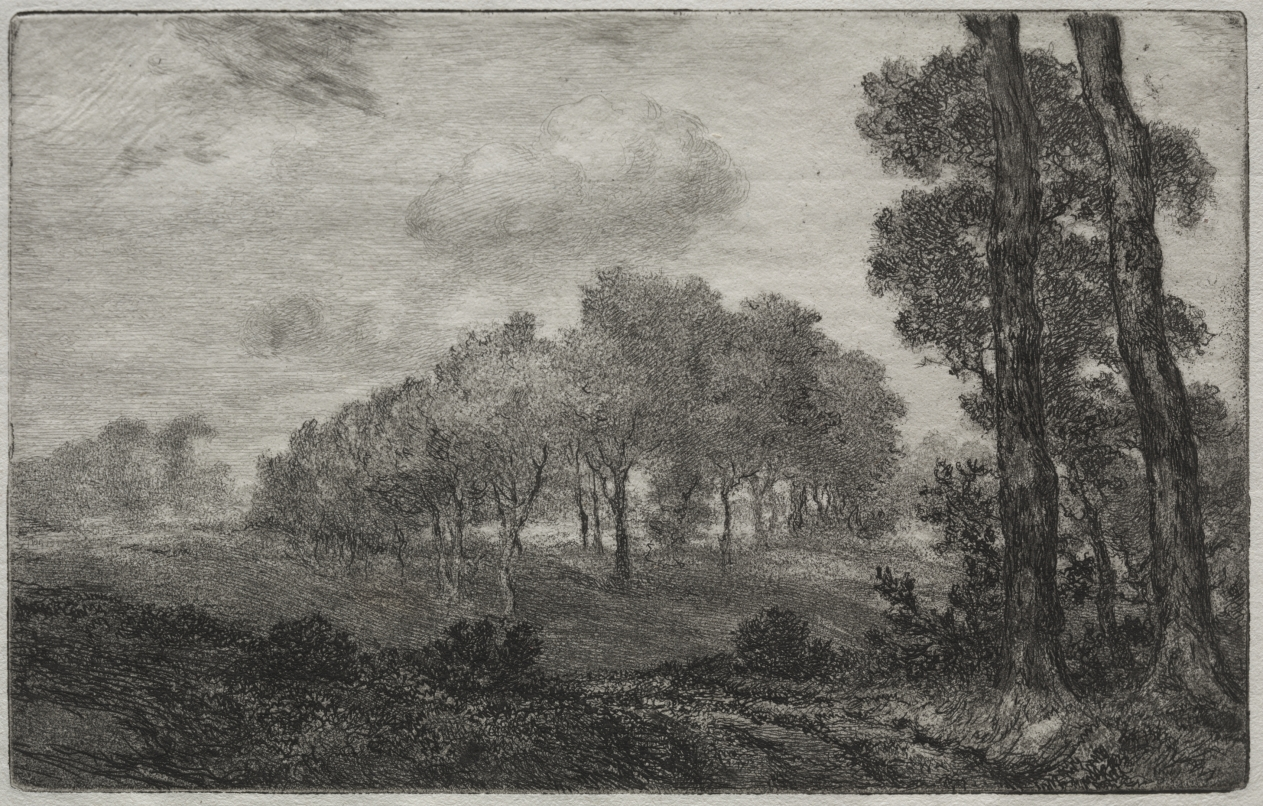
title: Landscape, after Français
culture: France, 19th century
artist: Félix Bracquemond (French, 1833–1914)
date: c. 1860–70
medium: etching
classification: Print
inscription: lower right, in ink: B.